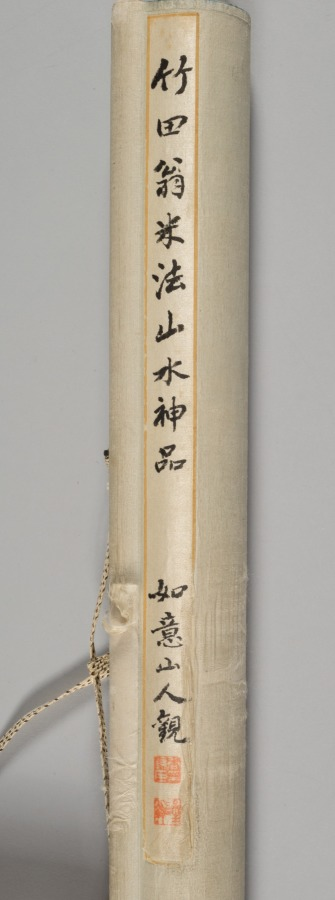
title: Mountain View and Blue Water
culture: Japan, Edo period (1615–1868)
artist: Tanomura Chikuden (Japanese, 1777–1835)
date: early 1800s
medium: hanging scroll; ink, color, and gold on paper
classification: Painting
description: Tanomura Chikuden was an eminent painter whose adopted son, Tanomura Chokunyū (1814–1907), was Seifū Yohei III’s painting teacher. This work was displayed at a gathering commemorating the 10th anniversary of Chokunyū’s death, something we know only because its custom-made box and archival documents have been carefully kept together. The box inscription also confirms that Chikuden was emulating the style of the Mi family of painters, active during China’s Southern Song dynasty (1127–1279). The painting’s Chinese-style silk wrapper is inscribed and sealed on its interior by members of Chokunyū’s community.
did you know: The mountain shapes are built up with multiple small wet strokes.